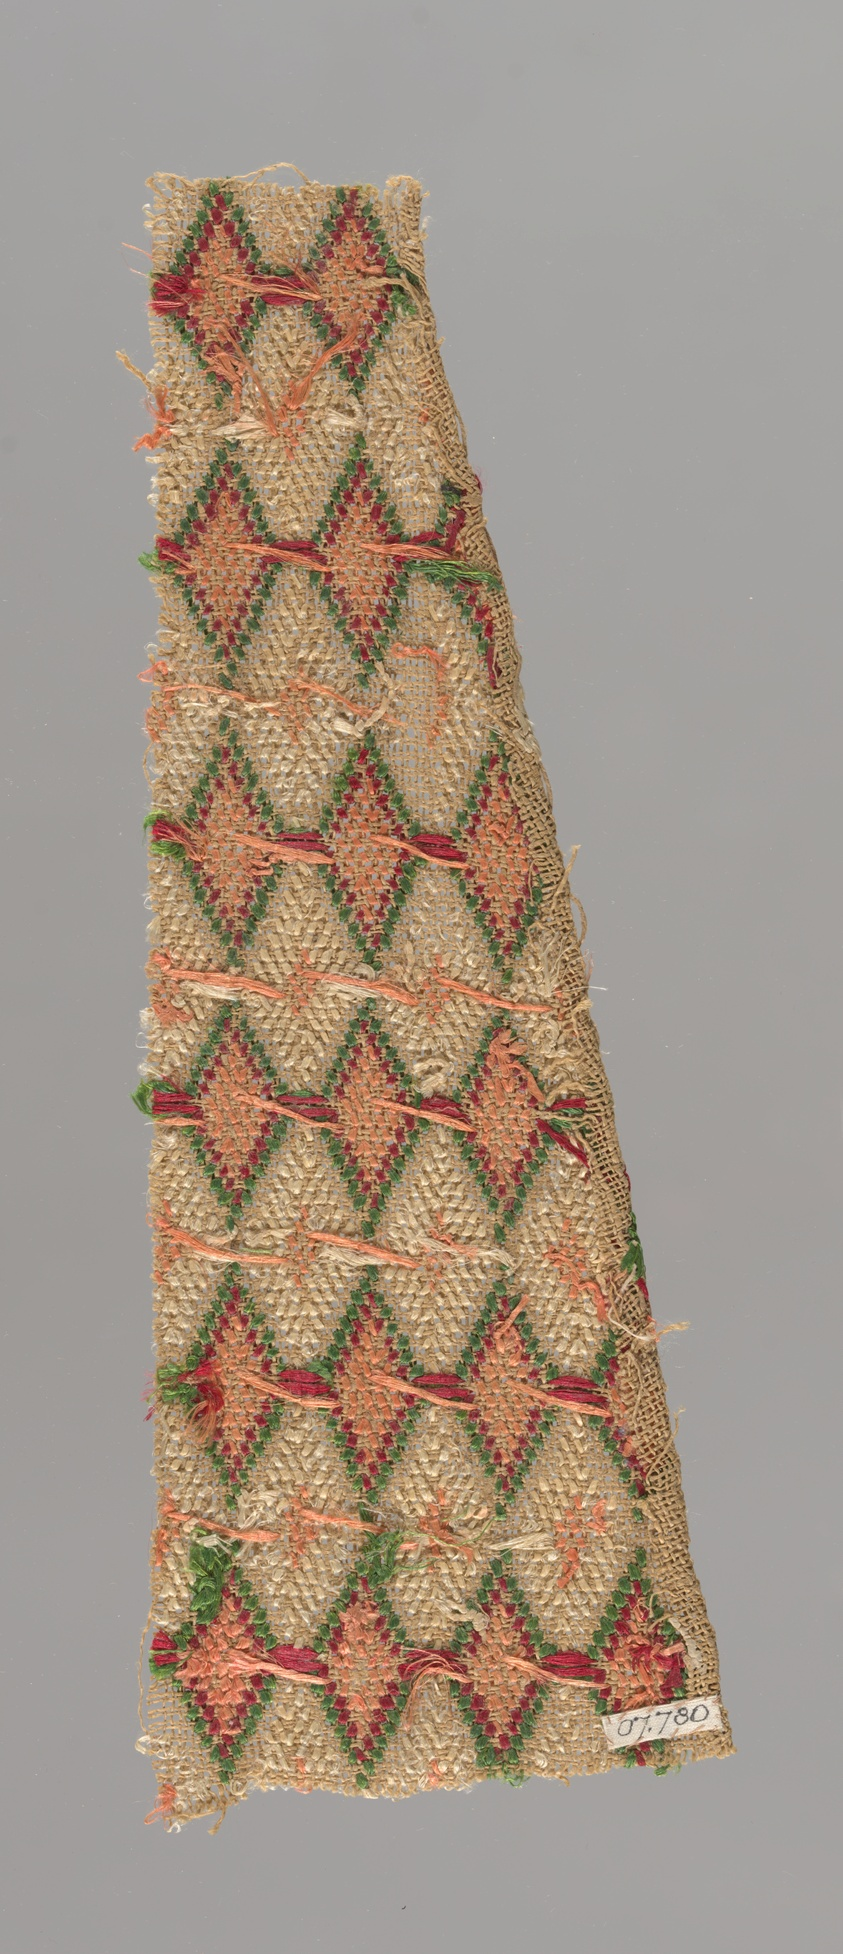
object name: Textile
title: Fragment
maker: Italy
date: 18th century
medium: Linen; embroidered with silk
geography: Italy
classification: textile; needlework (visual works)